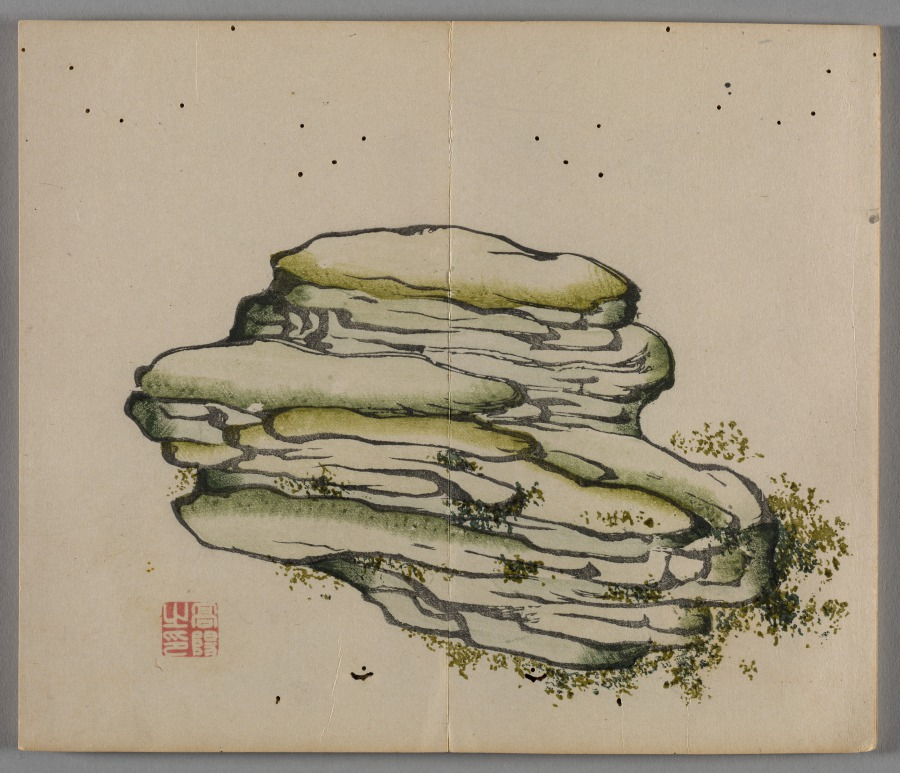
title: Ten Bamboo Studio Painting and Calligraphy Handbook (Shizhuzhai shuhua pu): Rocks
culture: China, Qing dynasty (1644-1911)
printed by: Hu Zhengyan (Chinese, c. 1584–1674)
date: 1633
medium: Woodblock-printed book; ink and colors on paper; first edition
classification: Print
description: Color printing reached a level of perfection in the early 1600s, as seen in this Ten Bamboo Studio Collection of Calligraphy and Painting and the Mustard Seed Garden Manual of Painting (printed 1679 and 1701). The painterly quality, precision in registering (aligning) the woodblocks, and harmonious colors made them the most successful color print editions in Chinese history. Both editions were printed and compiled in Nanjing, spread nationwide, and had a great impact on the arts in Japan and Korea.